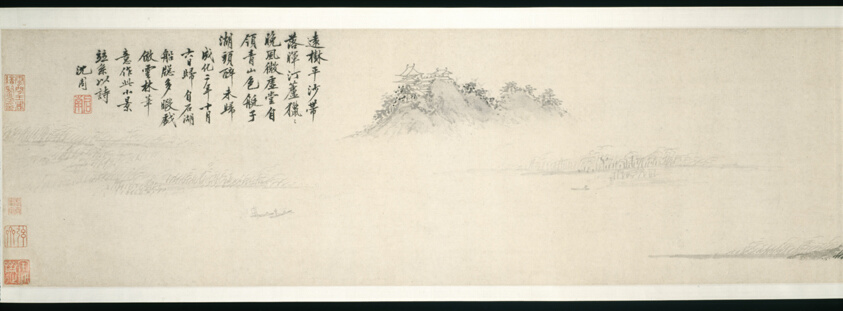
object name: Painting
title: Return to Stone Lake 石湖歸棹圖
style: Chinese (culture or style)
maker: Shen Zhou, 沈周; Chinese, 1427-1509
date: Ming dynasty (1368–1644), dated 1466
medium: Handscroll; ink on paper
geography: China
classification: handscroll; painting; asian art